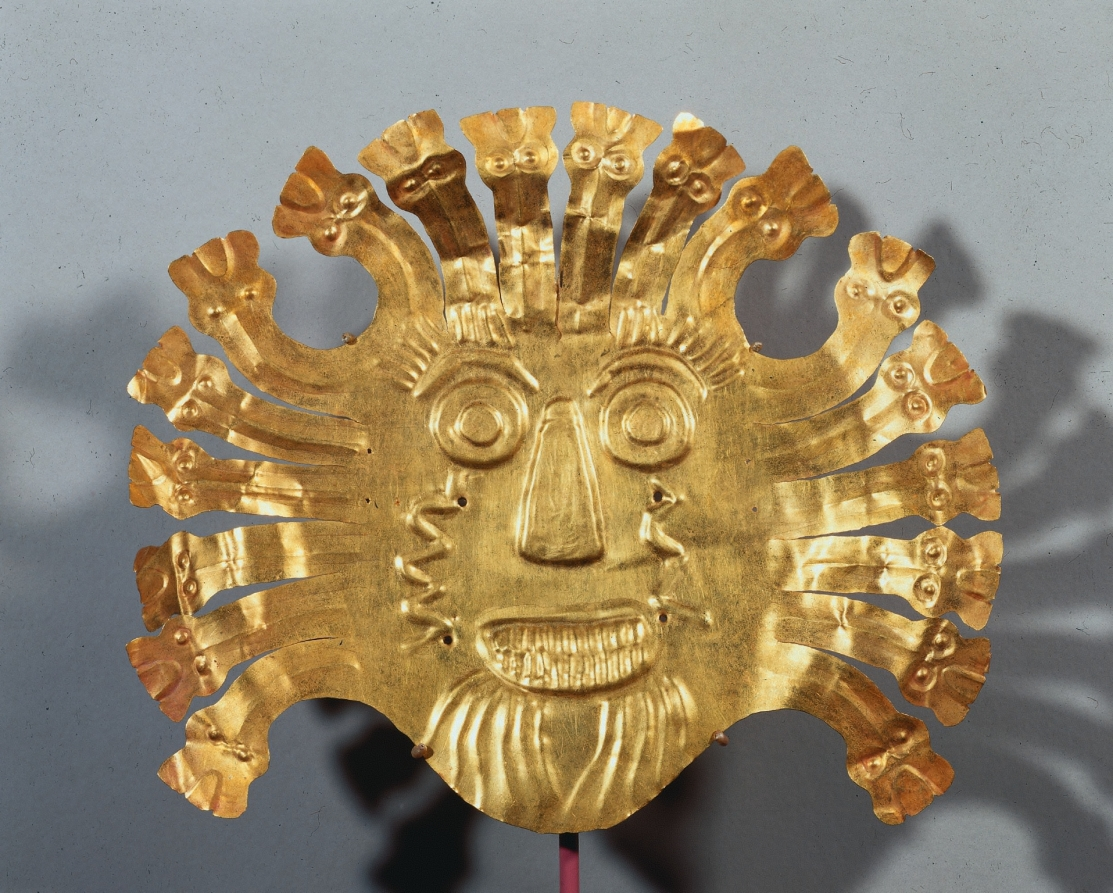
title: Mask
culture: Peru, South Coast, Nasca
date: 100 BCE–700 CE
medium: hammered gold alloy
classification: Metalwork